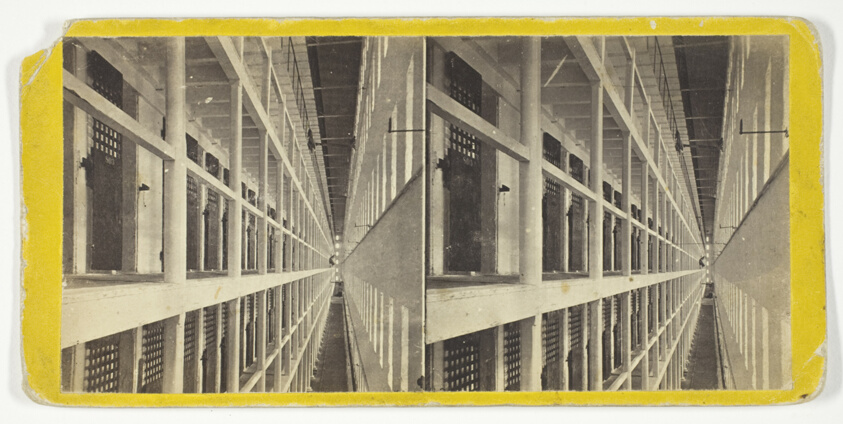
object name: Photograph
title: Interior View of the Main Hall of Prison, East Side, which is 6 Stories High, and Contains 600 Cells, No. 4318 from the series "Sing Sing Prison Views"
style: 19th century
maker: Anthony & Company; American, active 1848–1901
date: 1860/69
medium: Albumen print, stere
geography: United States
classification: stereograph (albumen); albumen silver print; photographic process; photography; photograph